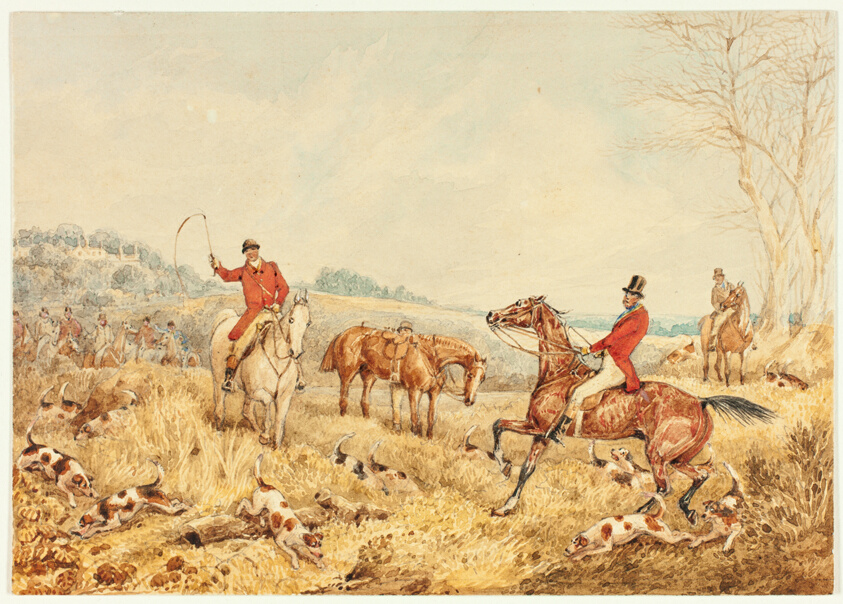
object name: Drawing and Watercolor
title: Hunting Scene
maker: Henry Alken (English, 1785-1851)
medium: Watercolor, over graphite, on cream wove paper, laid down on gray wove paper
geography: England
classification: drawings (visual works); prints and drawing